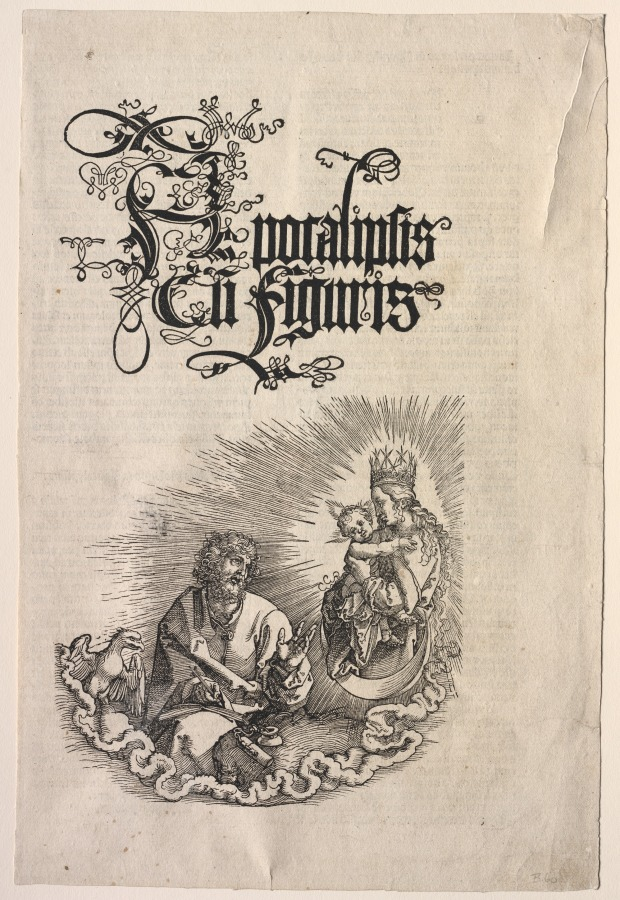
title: Revelation of St. John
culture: Germany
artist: Albrecht Dürer (German, 1471–1528)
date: 1511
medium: woodcut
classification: Print